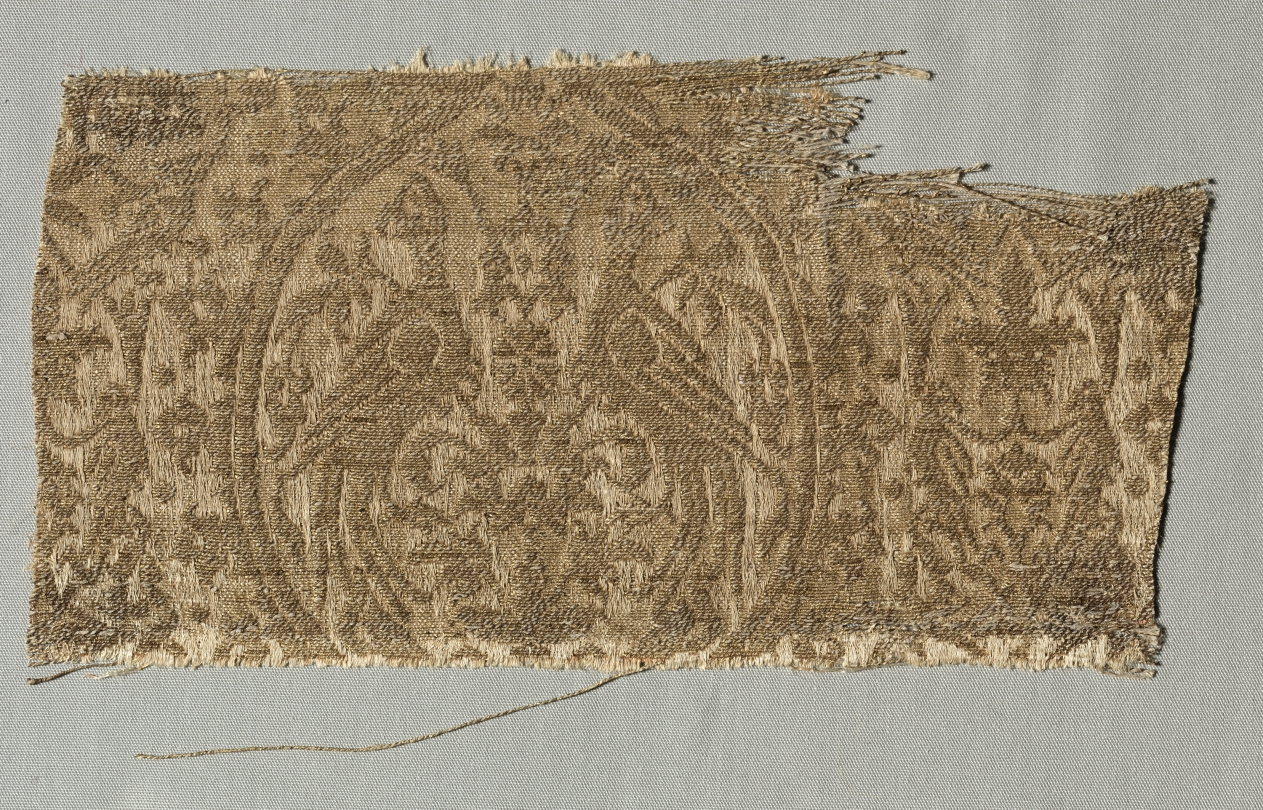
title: Fragment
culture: Iran or Iraq ?, Mongol period, 14th century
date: 1300s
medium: Silk and gold thread; lampas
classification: Textile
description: On this textile fragment, a pair of phoenixes, affronted and nonregardant, flanking a floral motif are framed in an ogive formed by a vine with trifoliate leaves. This, in turn, is framed with a scrolling vine with leaves and pairs of small birds. The design is in Cyprian gold on a coral ground.